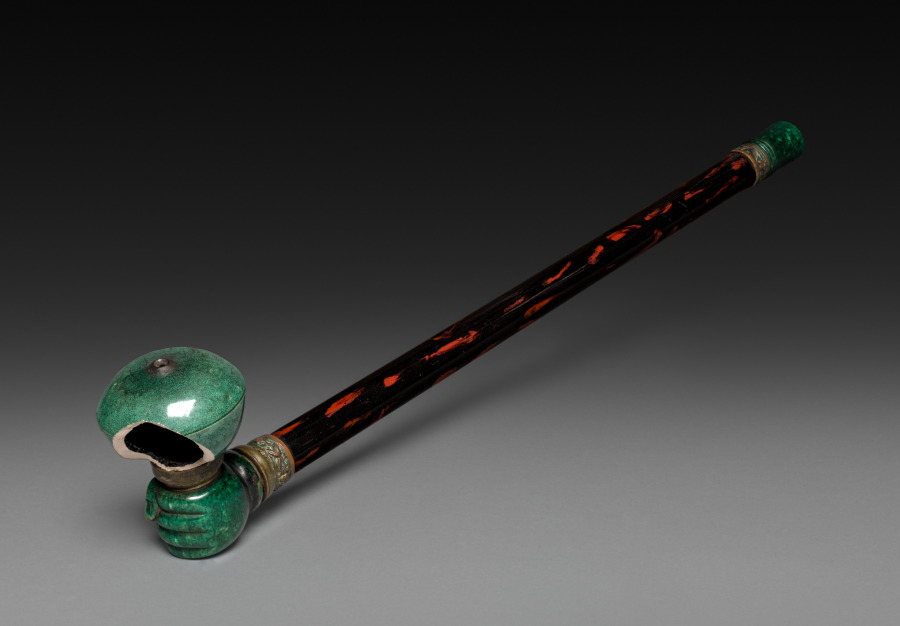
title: Opium Pipe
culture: China, Qing dynasty (1644-1911)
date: 1800s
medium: lacquer, copper ferrules, and porcelain bowl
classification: Miscellaneous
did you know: The stem terminates in the shape of a closed hand holding a green porcelain bowl.